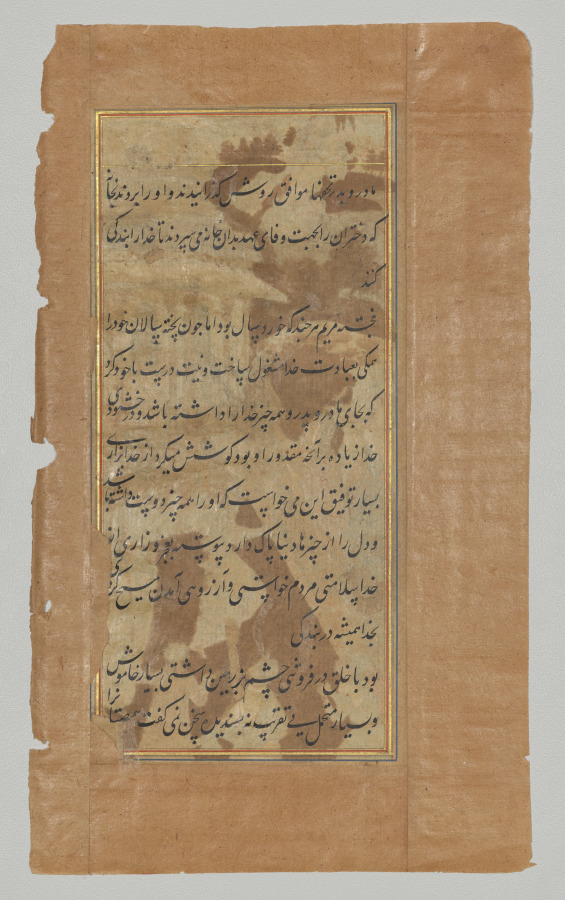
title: Text, Folio 9 (verso), from a Mirror of Holiness (Mir’at al-quds) of Father Jerome Xavier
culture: Mughal India, Allahabad, made for Prince Salim (1569–1627)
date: 1602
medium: Ink and gold on paper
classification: Manuscript